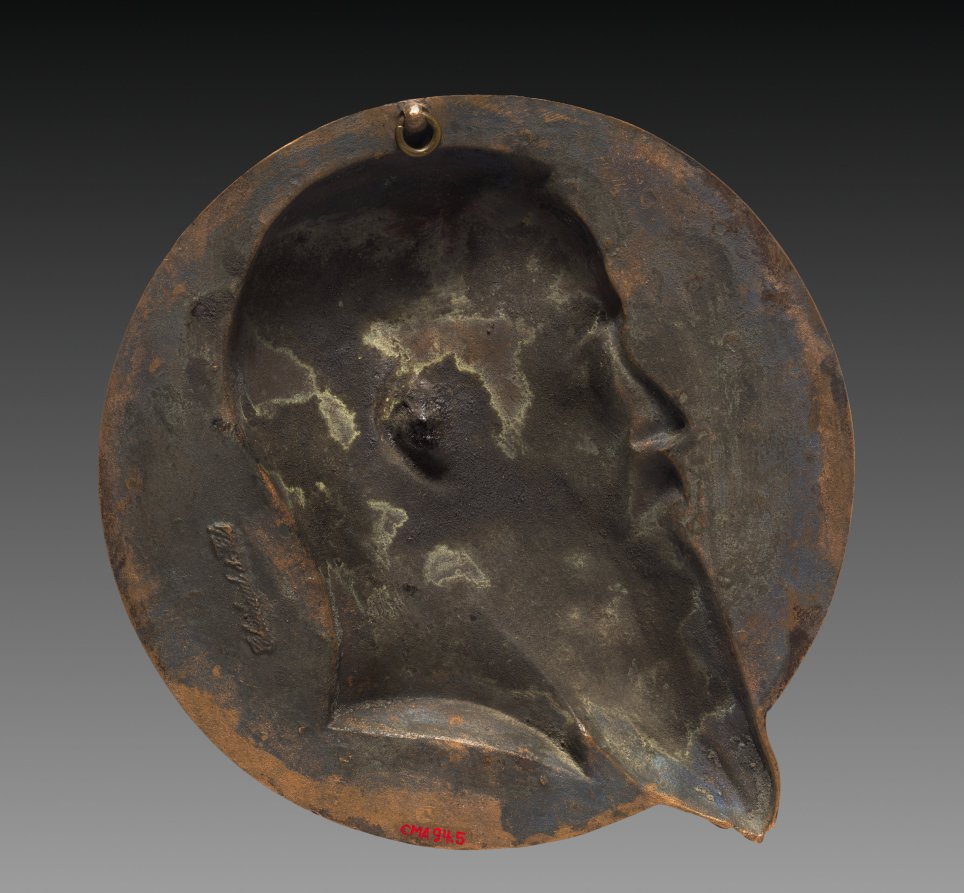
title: Portrait of Anatole La Forge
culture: France, 19th century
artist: Aimé Millet (French, 1819–1891)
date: 1878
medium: bronze relief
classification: Sculpture